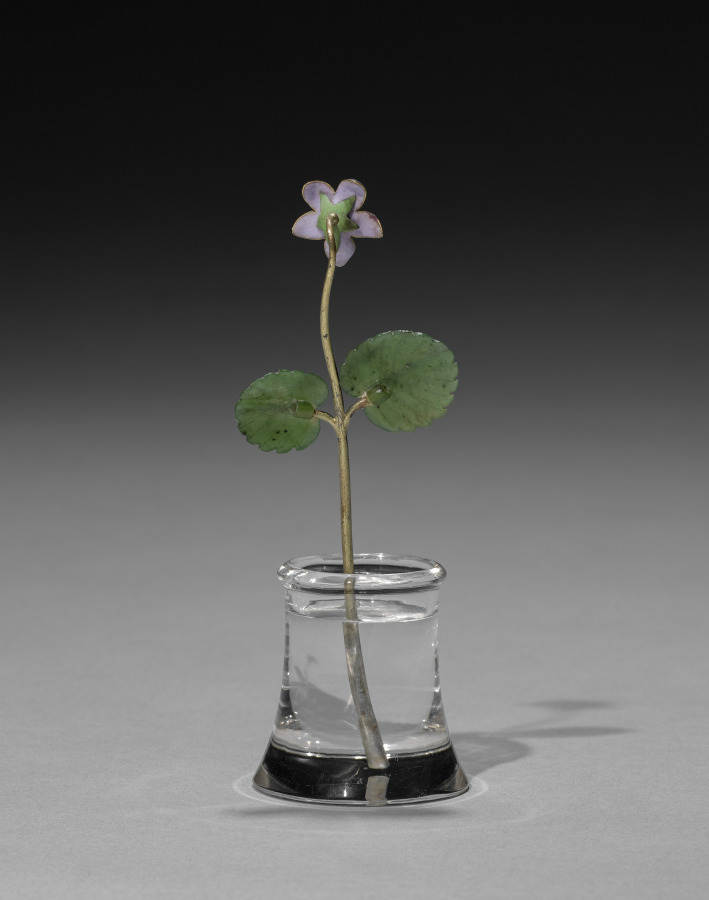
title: Flower Study of a Violet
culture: Russia, St. Petersburg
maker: House of Fabergé (Russian, 1842–1918)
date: c. 1885–1915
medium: enamel, silver gilt, jade, diamond, rock crystal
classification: Miscellaneous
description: This flower study depicts a single stem of violet. Fabergé’s inspiration for his flower studies is said to have come from the floral brooches of precious stones that were made in the 1700s for Catherine the Great as well as from the Japanese art of flower arranging, known as ikebana. Small and delicate, Fabergé’s flower studies were given as intimate gifts to friends by the tsarina and others in the court. She also liked to take them around to wherever the imperial family was residing as a reminder of spring during the harsh Russian winters.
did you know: The stems of Fabergé’s flower studies are set into little basins carved from rock crystal to resemble pots of water.